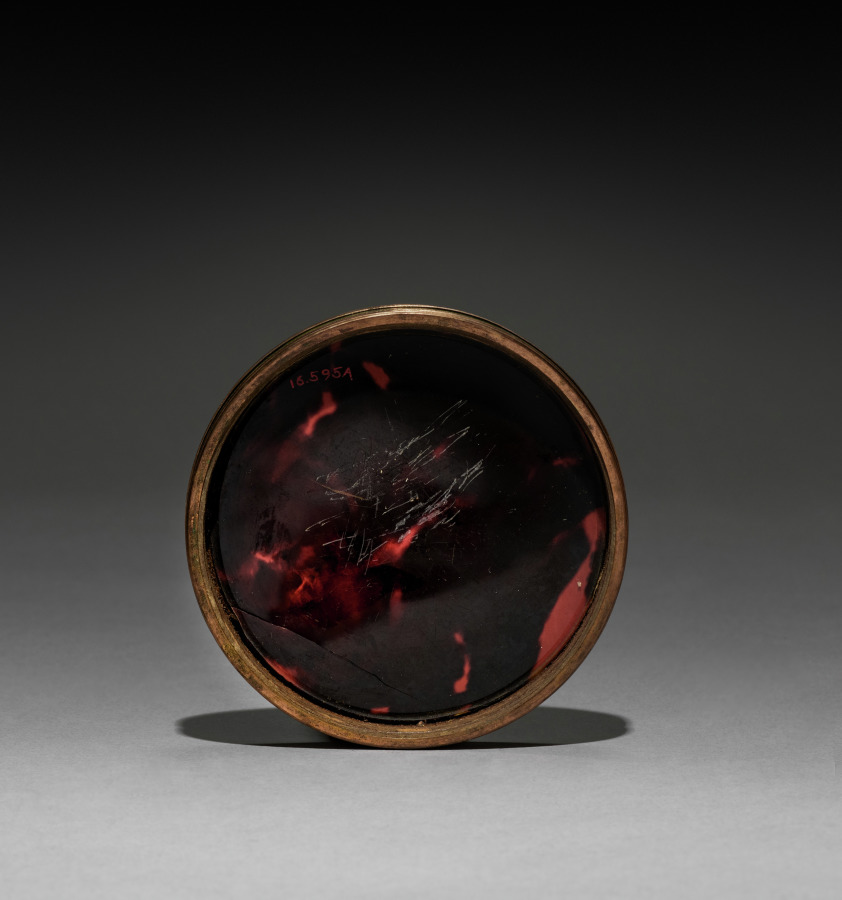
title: Cover for a Box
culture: France, 18th century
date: 1700s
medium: lacquer with tortoiseshell lining, gilt metal mounts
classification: Miscellaneous